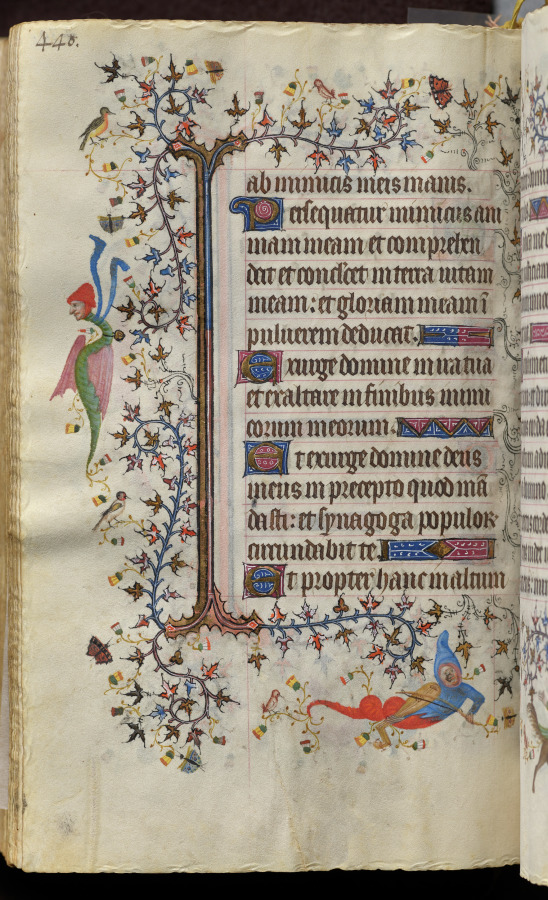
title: Hours of Charles the Noble, King of Navarre (1361-1425): fol. 214v, Text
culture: France, Paris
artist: Master of the Brussels Initials and Associates (French)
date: c. 1405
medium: ink, tempera, and gold on vellum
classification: Bound Volume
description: This precious volume was obviously highly prized by its owner, the French-born King of Navarre, who had his coat of arms painted on no less than twenty folios. Rather than directly commissioning this manuscript from a specific workshop, it seems that Charles the Noble acquired his book of hours -- perhaps ready-made for the luxury market -- while on a trip to Paris in 1404-05. A collaborative effort, six painting styles are evidenced within the pages of this codex, those of two Italians, two Frenchmen, and two Netherlanders. The painter who was responsible for the planning and decoration of the book, and who produced seventeen of the large miniatures, was a Bolognese artist known as the Master of the Brussels Initials. His principal assistant, responsible for most of the borders, was a Florentine who signed his name "Zecho" da Firenze on folio 208 verso.